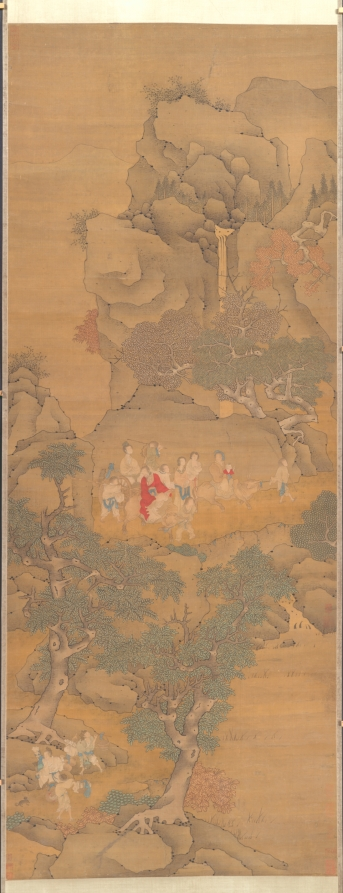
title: Xu Jingyang Moving His Family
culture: China, Ming dynasty (1368–1644)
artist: Cui Zizhong (Chinese, 1574–1644)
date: 1644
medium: Hanging scroll; ink and color on silk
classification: Painting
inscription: Artist's 2 seals: Pei-hai, Cui Zizhong yin.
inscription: 9 additional seals: 2 of Xiang Yuan (18th-19th c.); 1 of Tang Zuomei (late 18th-19th c.); 1 of Zhang Heng 張珩 (1915-1963); 1 of C. C. Wang 王季遷 (1907–2003); 4 unidentified.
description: Xu Jingyang was a dedicated fourth-century Confucian official who allegedly turned into a Daoist immortal. This scroll depicts the legend that when he attained immortality, he took his entire household, including chickens and dogs, to paradise. Cui Zizhong’s painting style intentionally referenced ancient masters. Typical of the pre-Song dynasty landscape tradition, there is the use of blue and green colors and an emphasis on outline rather than texture. While the trembling outlines are reminiscent of earlier painters, the flickering light on rocks and trees is a stylistic feature of Cui’s own time.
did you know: Xu Jingyang, wearing red, is in the upper register of figures, while below his servants transport a rooster, dog, and other supplies.